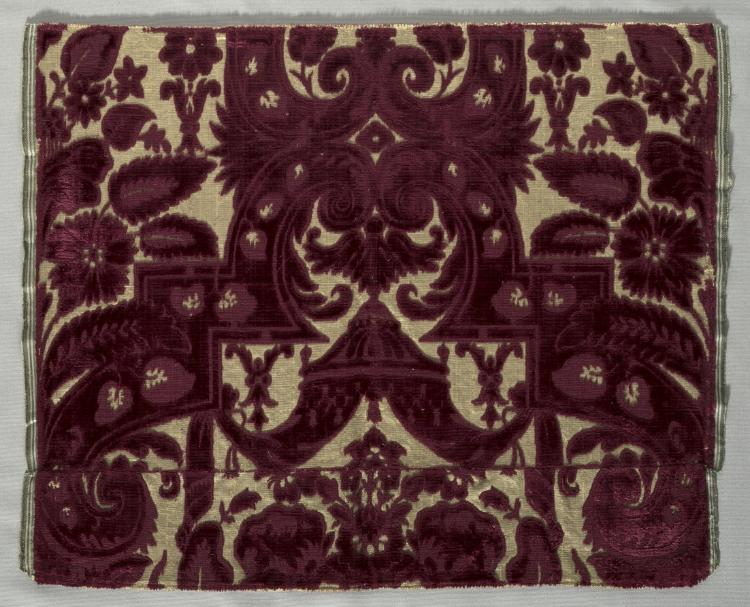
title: Length of Velvet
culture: Italy, Genoa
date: 1600s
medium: velvet (cut and uncut); silk and flat gold wire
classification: Velvet